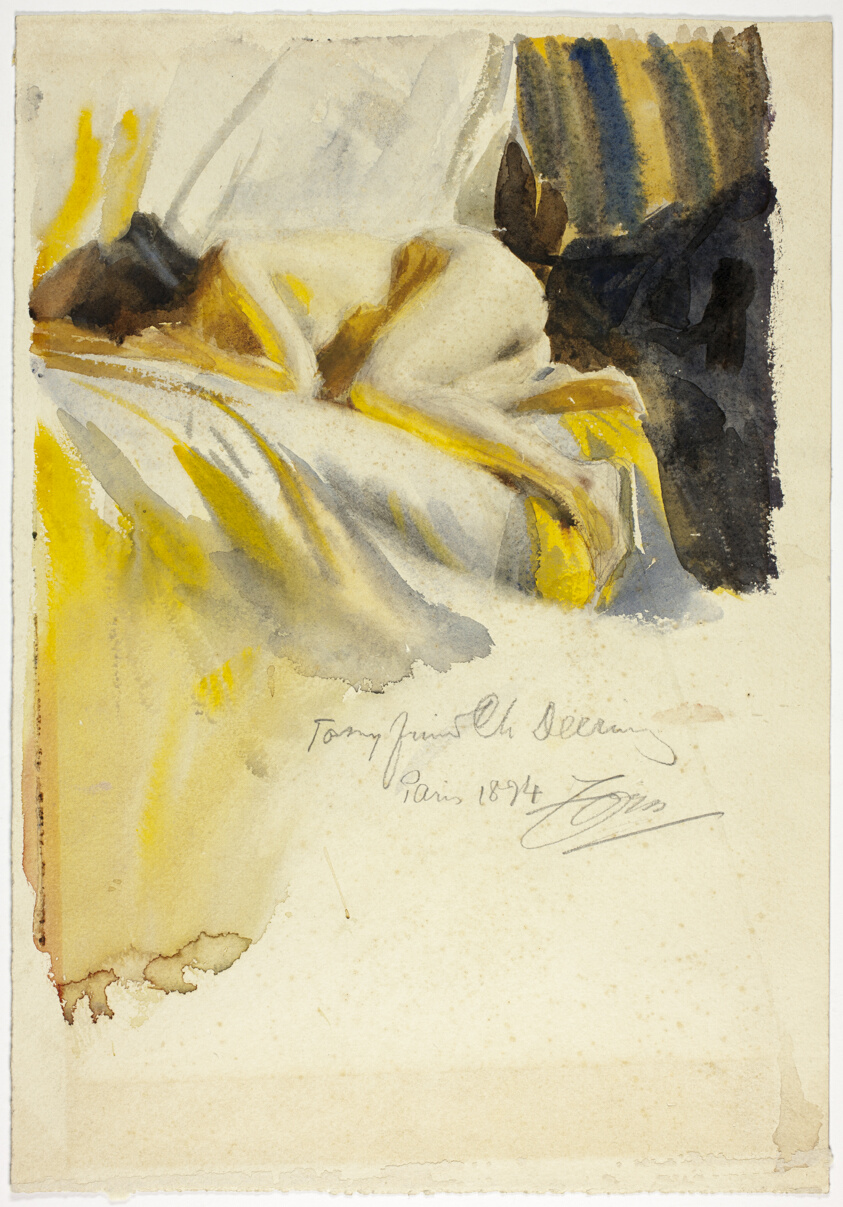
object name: Drawing and Watercolor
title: Nude Lying On Bed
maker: Anders Zorn (Swedish, 1860-1920)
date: 1894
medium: Graphite and watercolor on ivory wove paper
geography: Sweden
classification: graphite; prints and drawing; paper